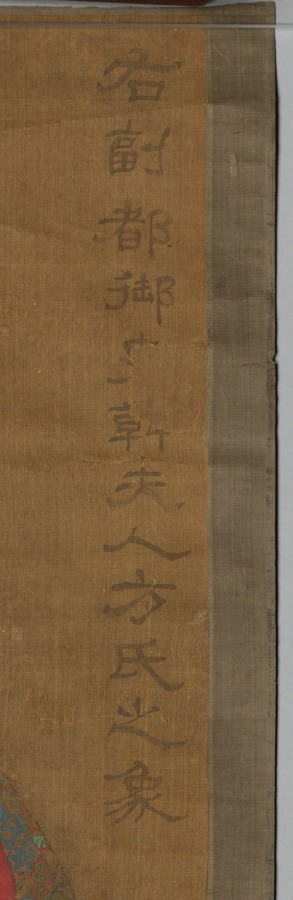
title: Madam Han Neefang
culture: China, Ming dynasty (1368–1644)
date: 1368–1644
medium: hanging scroll, ink and color on silk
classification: Painting